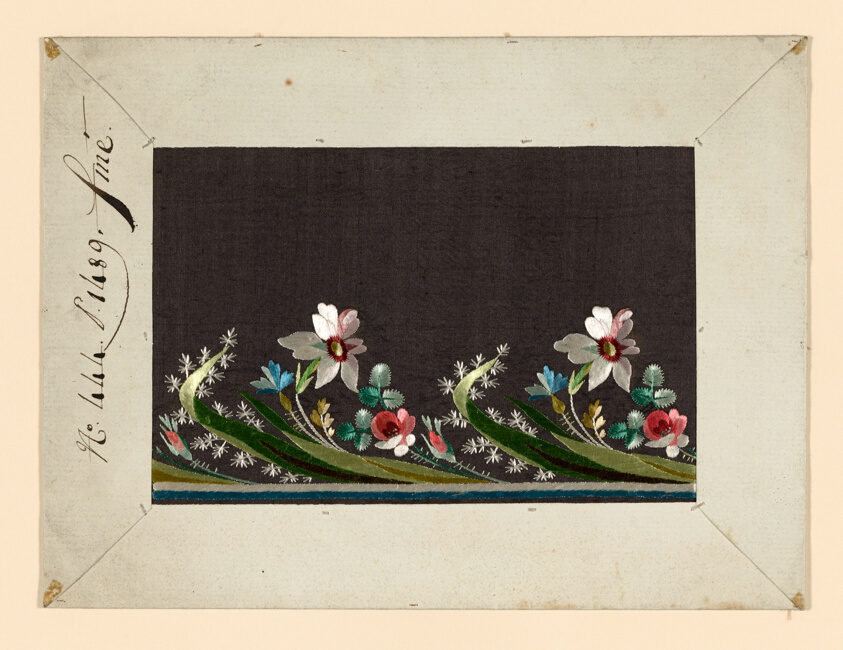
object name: Textile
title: Salesman's Sample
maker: France, possibly Lyon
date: 1780/90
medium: Silk, warp-faced plain weave; embroidered with silk floss in outline, satin, single satin and stem stitches; French knots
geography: France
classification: textile; costume; needlework (visual works)